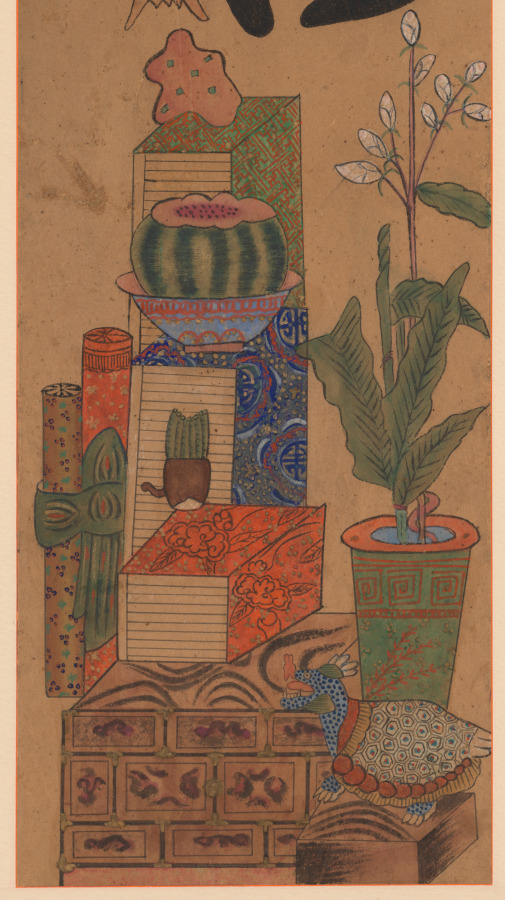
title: Munja-Chaekgeori Screen (Character-Books Screen)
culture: Korea, Joseon dynasty (1392–1910)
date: early 1900s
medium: Eight-panel folding screen, ink on paper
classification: Painting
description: This folding screen is a whimsical harmony of two different subjects: chaekgeori, or books and things; and munja, or characters. The lower section of each panel depicts the imagery of things, including books, decorative arts, and utilitarian objects. The upper portion of each panel bears a classical Chinese character. Read from far right to left, the eight characters refer to the values of Confucian teachings of the Joseon dynasty: filial piety, brotherly love, loyalty, trust, propriety, righteousness, modesty, and humility. While these two pictorial genres are harmoniously conjoined on the same picture plane, two sharply contrasting world views—urban consumerism and traditional Confucian ethics that despise materialism—compete with one another.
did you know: The eight Korean characters each mean filial piety, brotherly love, loyalty, trust, propriety, righteousness or justice, modesty or integrity, and humility or the feeling of shame.